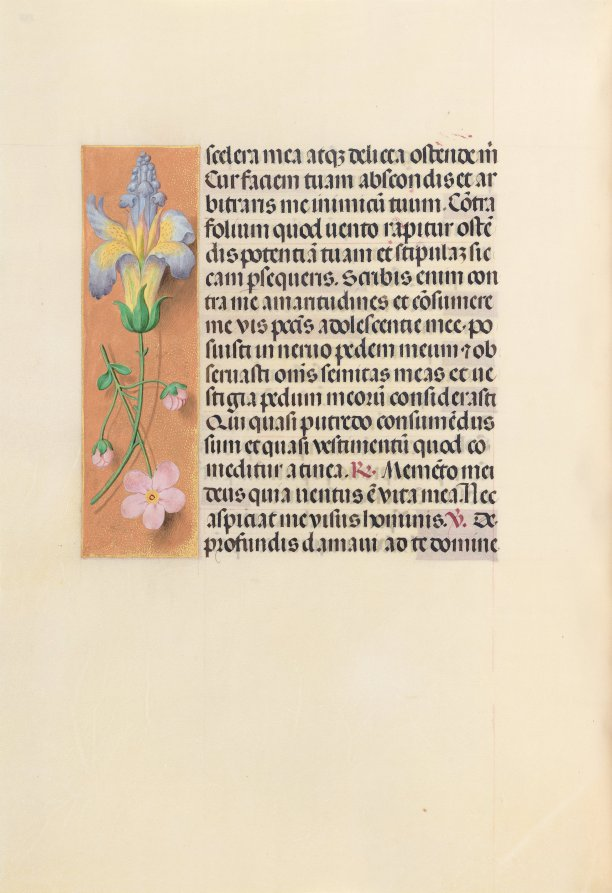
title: Hours of Queen Isabella the Catholic, Queen of Spain: Fol. 237v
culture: Flanders, Ghent and Bruges, late 15th century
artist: Master of the First Prayerbook of Maximillian (Flemish, c. 1444–1519)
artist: and Associates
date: c. 1500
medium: ink, tempera, and gold on vellum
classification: Bound Volume